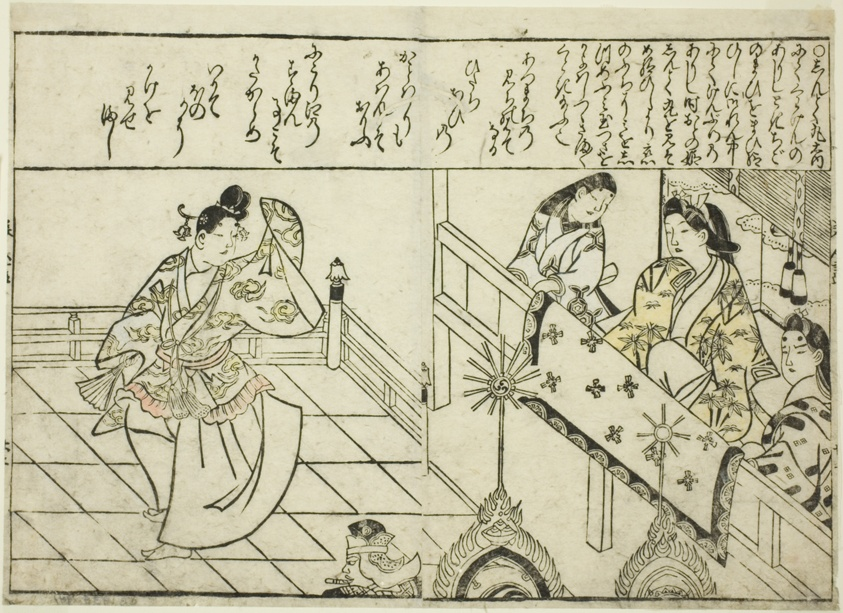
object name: Print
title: Shintokumaru Dancing before Oto Hime, from the illustrated book "Collection of Pictures of Beauties (Bijin e-zukushi)"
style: Japanese (culture or style)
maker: Hishikawa Moronobu (Japanese, (?)-1694)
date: c. 1683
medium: Hand-colored woodblock print; double-page illustration cut from a book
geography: Japan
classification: woodblock print; print; asian art